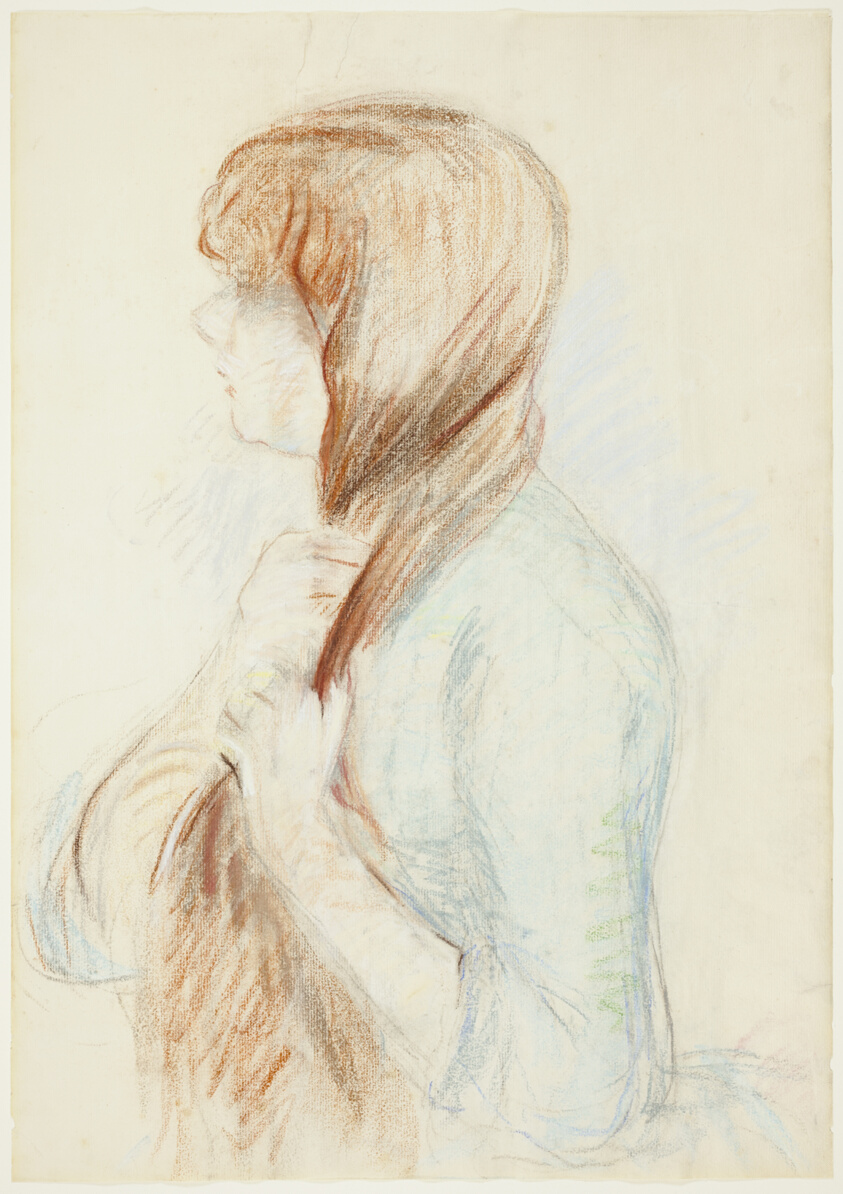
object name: Drawing and Watercolor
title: Girl Plaiting her Hair (La Natte)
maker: Berthe Morisot (French, 1841-1895)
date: 1894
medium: Pastel, on cream laid paper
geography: France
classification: pastel; drawings (visual works); prints and drawing